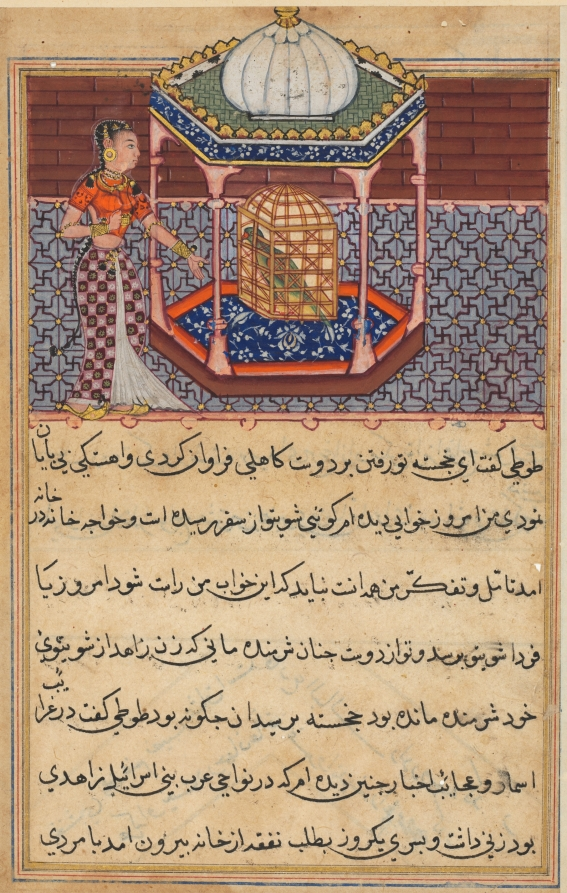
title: The parrot addresses Khujasta at the beginning of the fifty-second night, from a Tuti-nama (Tales of a Parrot): Fifty-second Night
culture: Mughal India, court of Akbar (reigned 1556–1605)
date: c. 1560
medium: gum tempera, ink, and gold on paper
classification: Painting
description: On the final night of the Tuti-nama, Khujasta asks Tuti the parrot if she can leave to visit her lover. As the story ends, Khujasta’s husband, Maymun, returns home from his journey. Her affair is revealed, and she is ultimately killed. Maymun shaves his head, dons the robes of an ascetic, and enters a hermitage.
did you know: Tuti is telling Khujasta a story about how the son of a pious man became a king.